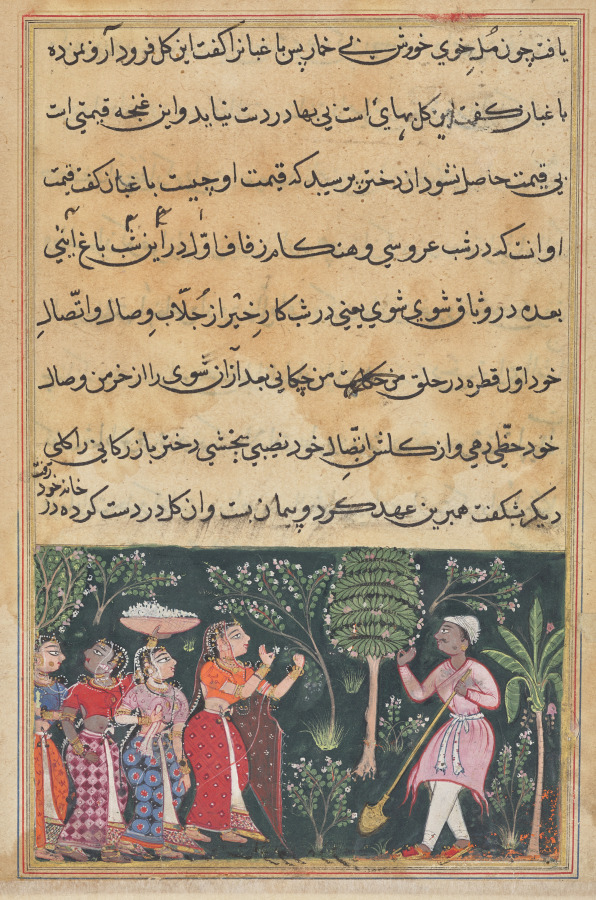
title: The daughter of the merchant of Mazanderan asks the gardener for the rose, from a Tuti-nama (Tales of a Parrot): Twelfth Night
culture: Mughal India, court of Akbar (reigned 1556–1605)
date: c. 1560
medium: gum tempera, ink, and gold on paper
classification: Painting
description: Persian books are read from right to left. One artist illustrated the three scenes from one of the 52 stories of the Tuti-nama, retaining many pre-Mughal traits. Trees stand out as bold shapes, and figures are arranged in a single register, or horizontal spatial band, and have angular and expressive gestures. The figures of the women are closely related to pre-Mughal types, shown always in profile and wearing garments that stand stiffly and sharply out before them. In leaves from the Tuti-nama, Mughal artists adapted the colors, compositions, and figure types of the earlier style.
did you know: This page was painted by the same anonymous artist who painted folios 99v (1962.279.99.b) and 100v (1962.279.100.b).